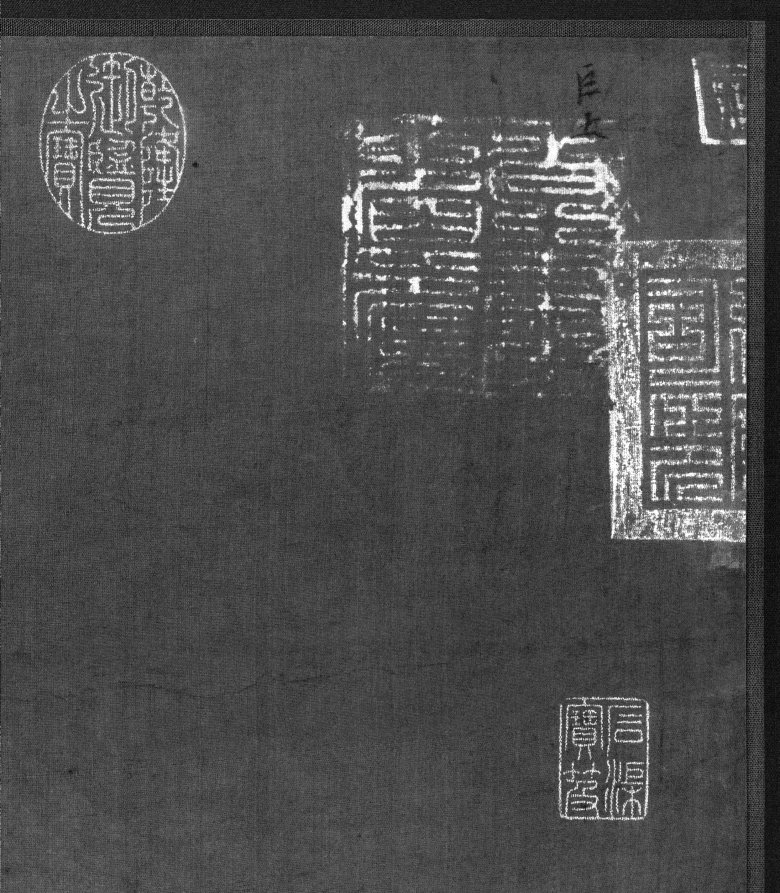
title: Buddhist Retreat by Stream and Mountains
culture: China, Northern Song dynasty (960-1127)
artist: Juran (Chinese, active 960–985)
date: 960–85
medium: Hanging scroll; ink on silk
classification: Painting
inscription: The upper portion of the scroll: the two small characters, “Ju wu 巨五”, written near the large seal. Written by a functionary in Shang Shu Sheng (the Department of State Affairs) when the painting was first received.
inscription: The upper portion of the scroll: the large seal, “Shang Shu Sheng yin 尚書省印” (seal of the Department of State Affairs)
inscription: The upper portion of the scroll: the half-seal “Si yin 司印”, seen along a border. Attributed to 典禮紀察司 of Ming dynasty.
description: Monk Juran served the Southern Tang (937–75) imperial house in Nanjing, where he studied with Dong Yuan (active 930s–60s). Both founded the southern landscape tradition, or Jiangnan school, known for gentle misty riverscapes in wet ink. Juran moved north to Kaifeng when the Southern Tang surrendered to the Northern Song, the impact of which may be seen in this painting, presumably painted after 976. A towering mountain dominates the composition, typically representing the style of the Northern Song academy; while the use of long hemp fiber strokes to texture the mountains, wet dots, and round boulders on mountain tops are elements of the southern landscape tradition.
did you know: This hanging scroll with the towering mountain is a prime example of the monumental landscape style of Northern Song.